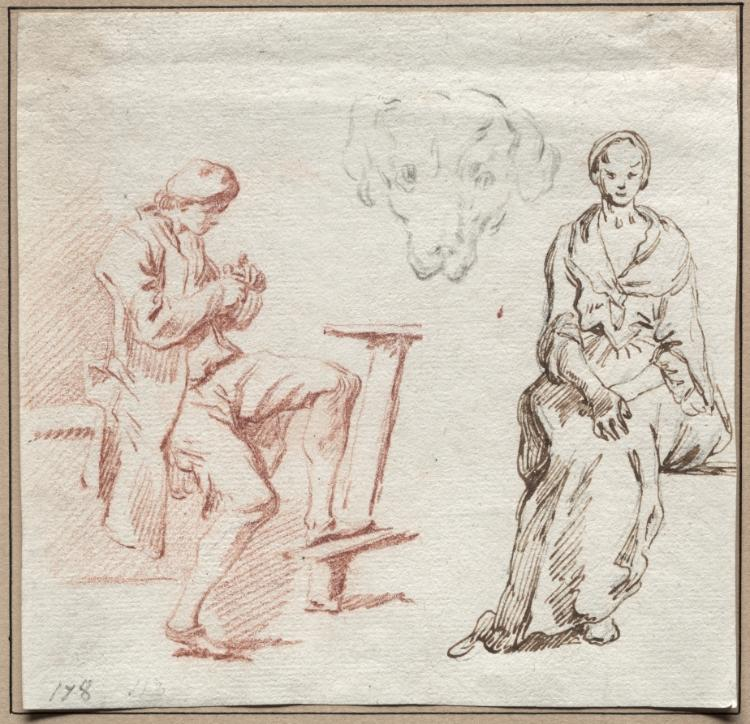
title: Sheet of Studies: Seated Man, Head of a Dog, Seated Woman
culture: France, 18th century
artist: Claude-Joseph Vernet (French, 1714–1789)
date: 1700s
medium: red chalk (seated man); black chalk (head of a dog); pen and brown ink over black chalk (seated woman)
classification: Drawing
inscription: lower left, in graphite: 178 ; lower left, in graphite: 113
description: At age 20, Claude-Joseph Vernet traveled to Italy, where he remained for two decades, painting landscape views of the Roman countryside and stormy, imaginary seascapes for Italian aristocrats and wealthy French and British tourists. Vernet populated his paintings with contemporary figures based on sketches from life, such as the three shown here. Drawn at different times in different media, together they form an amusing glimpse of Italian street life in the 1700s.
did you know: Claude-Joseph Vernet was first trained as an artist by his father, who was an artisan specializing in carriage decorations.